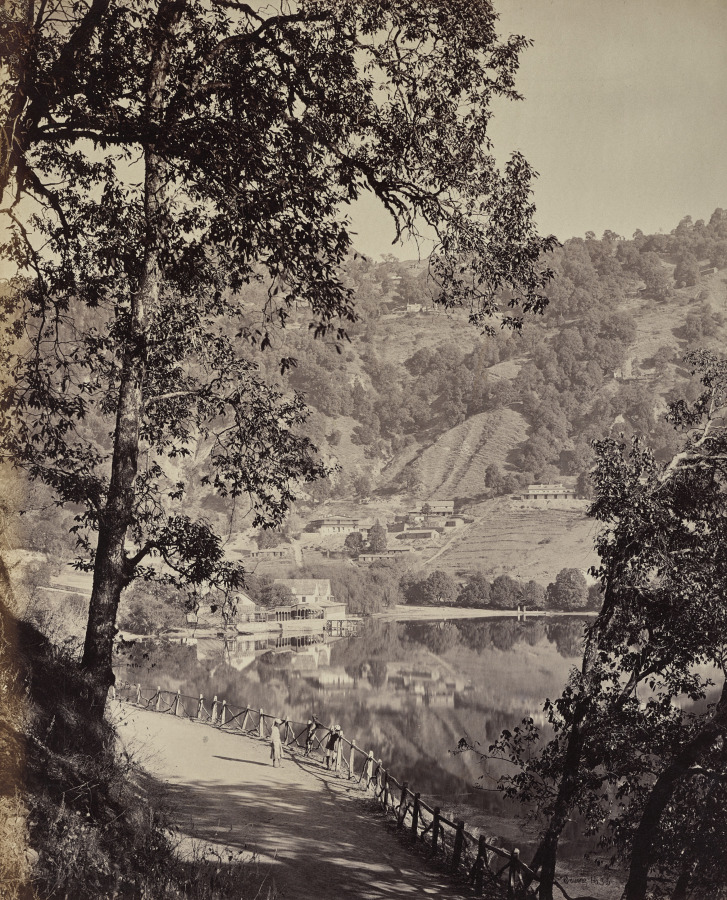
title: Hyree Lake. Hill Station in the Himmalayahs. View of the Taj Lake with Assembly Rooms, Lhutse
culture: England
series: Photographs of Northern India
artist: Samuel Bourne (British, 1834–1912)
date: 1863–70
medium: albumen print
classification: Photograph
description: The 50 images in this album, all taken in the 1860s, move from the hill towns of the Himalayas down to cities including Lahore (now in Pakistan), Delhi, Lucknow, Agra, Benares (now Varansi), and Calcutta (now Kolkata). Architectural studies of major monuments offer valuable historical records of what sites such as the Taj Mahal and the imperial mosque of the Mughal emperors in Delhi looked like before twentieth-century restorations.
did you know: Samuel Bourne, the author of most the images in this album, was a banker in England before he moved to India to become a professional photographer.